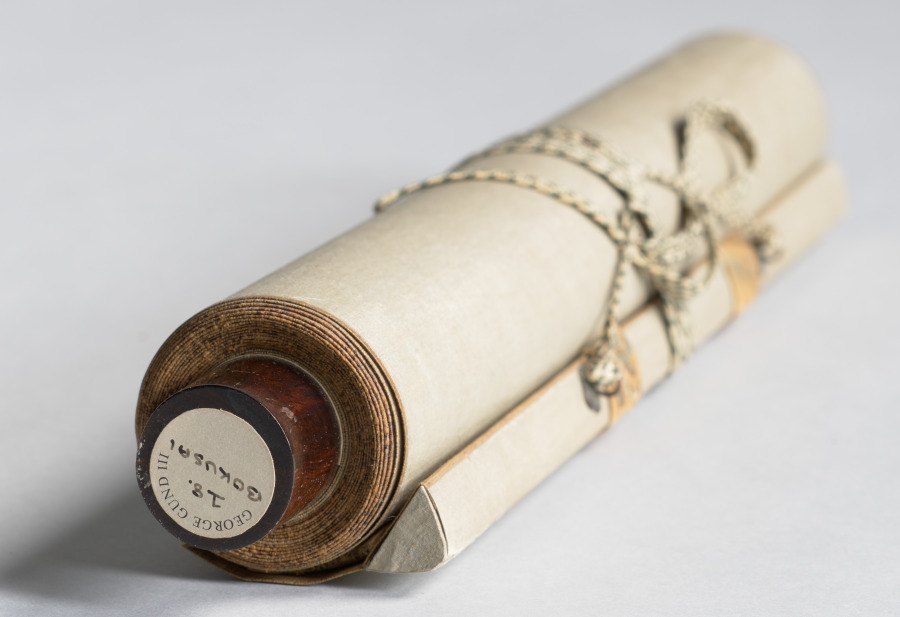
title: Single-column Calligraphy (Bright Moon and Fresh Breath as One . . . )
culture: Japan, Muromachi period (1392–1573)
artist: Motsurin Jōtō (Japanese, d. 1492)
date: 1400s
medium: hanging scroll; ink on paper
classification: Calligraphy